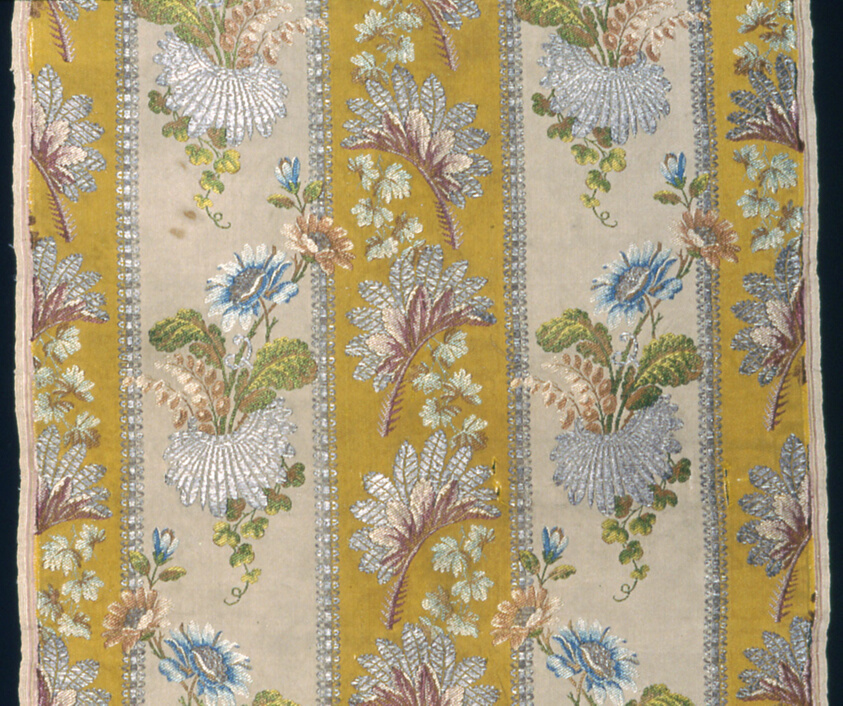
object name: Textile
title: Panel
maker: France, Lyon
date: 1760/70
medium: Silk and silvered-metal-strip-wrapped silk, plain weave with patterning warps and brocading wefts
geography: Lyon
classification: textile; weaving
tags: flowers, foliage, floral arrangements